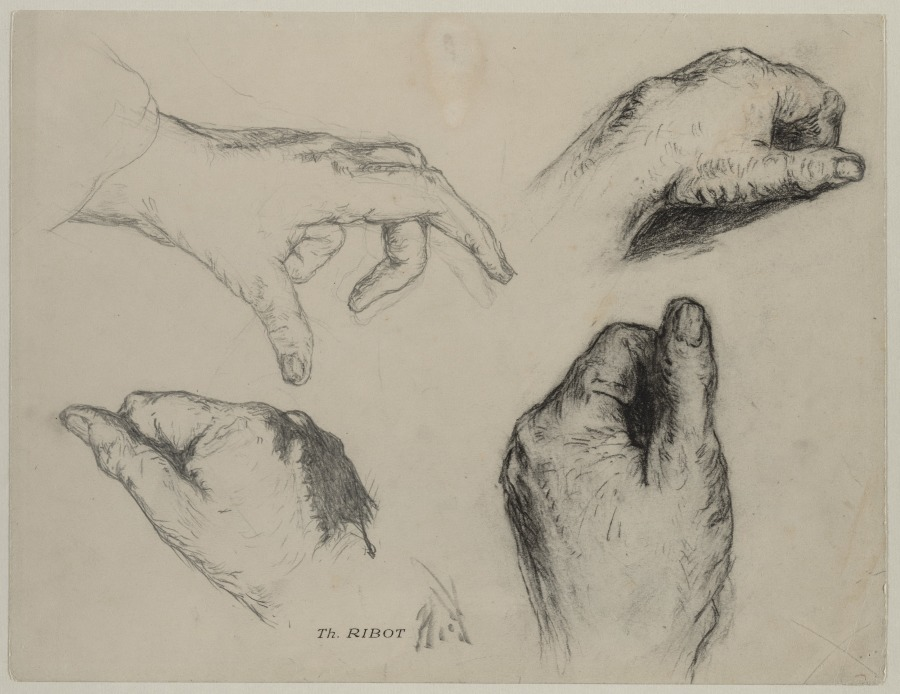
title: Study of Hands (recto); Study of a Woman's Hand (verso)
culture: France, 19th century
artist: Théodule Ribot (French, 1823–1891)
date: 1800s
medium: black chalk and graphite (recto)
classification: Drawing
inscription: inscribed in black ink, lower center; "Th. Ribot (estate stamp)